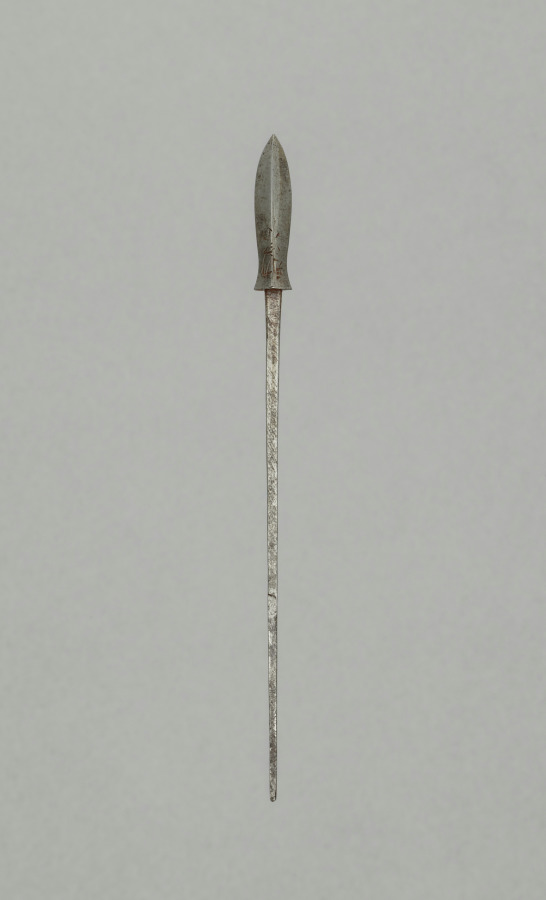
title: Arrow Point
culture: Japan, Edo period (1615–1868)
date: 1700s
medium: steel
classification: Arms and Armor